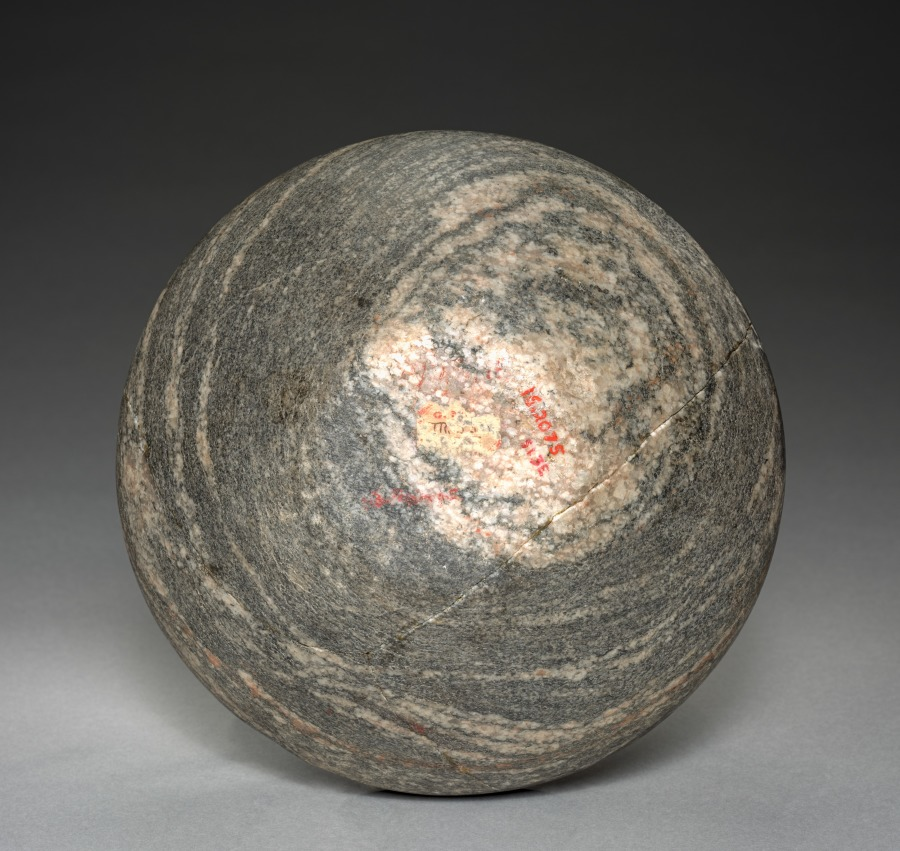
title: Bowl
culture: Egypt, Early Dynastic (2950–2647 BCE), Dynasty 2, reign of Nynetjer (c. 2700 BCE) or later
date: 2770–2647 BCE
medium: anorthosite gneiss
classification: Vessels